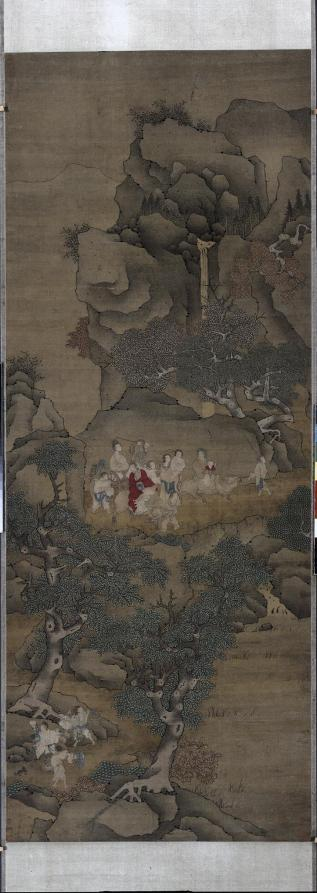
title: Xu Jingyang Moving His Family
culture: China, Ming dynasty (1368–1644)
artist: Cui Zizhong (Chinese, 1574–1644)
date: 1644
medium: Hanging scroll; ink and color on silk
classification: Painting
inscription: Artist's 2 seals: Pei-hai, Cui Zizhong yin.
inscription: 9 additional seals: 2 of Xiang Yuan (18th-19th c.); 1 of Tang Zuomei (late 18th-19th c.); 1 of Zhang Heng 張珩 (1915-1963); 1 of C. C. Wang 王季遷 (1907–2003); 4 unidentified.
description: Xu Jingyang was a dedicated fourth-century Confucian official who allegedly turned into a Daoist immortal. This scroll depicts the legend that when he attained immortality, he took his entire household, including chickens and dogs, to paradise. Cui Zizhong’s painting style intentionally referenced ancient masters. Typical of the pre-Song dynasty landscape tradition, there is the use of blue and green colors and an emphasis on outline rather than texture. While the trembling outlines are reminiscent of earlier painters, the flickering light on rocks and trees is a stylistic feature of Cui’s own time.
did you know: Xu Jingyang, wearing red, is in the upper register of figures, while below his servants transport a rooster, dog, and other supplies.